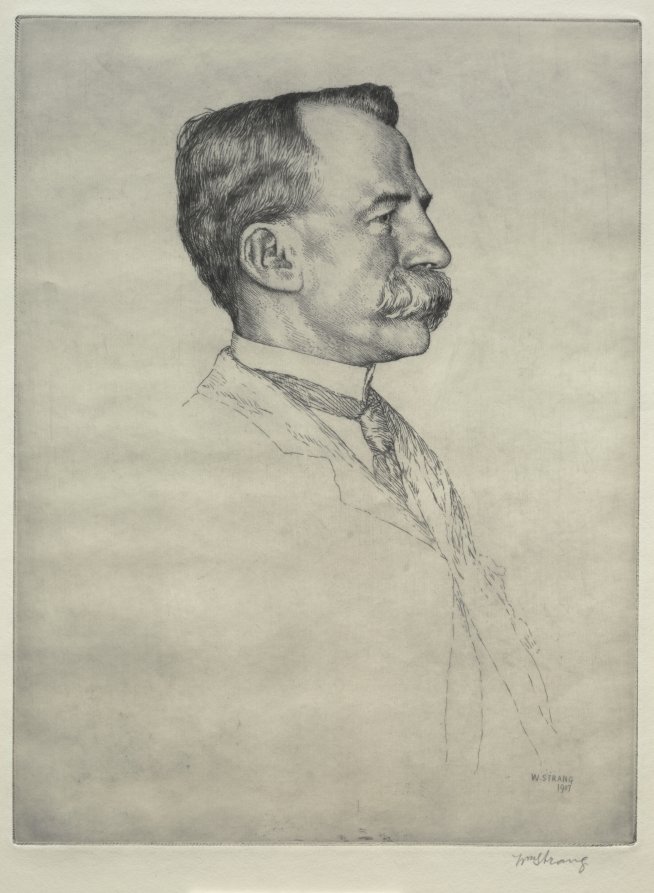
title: E. T. Bull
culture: England, late 19th Century-early 20th Century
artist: William Strang (British, 1859–1921)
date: 1907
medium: etching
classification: Print